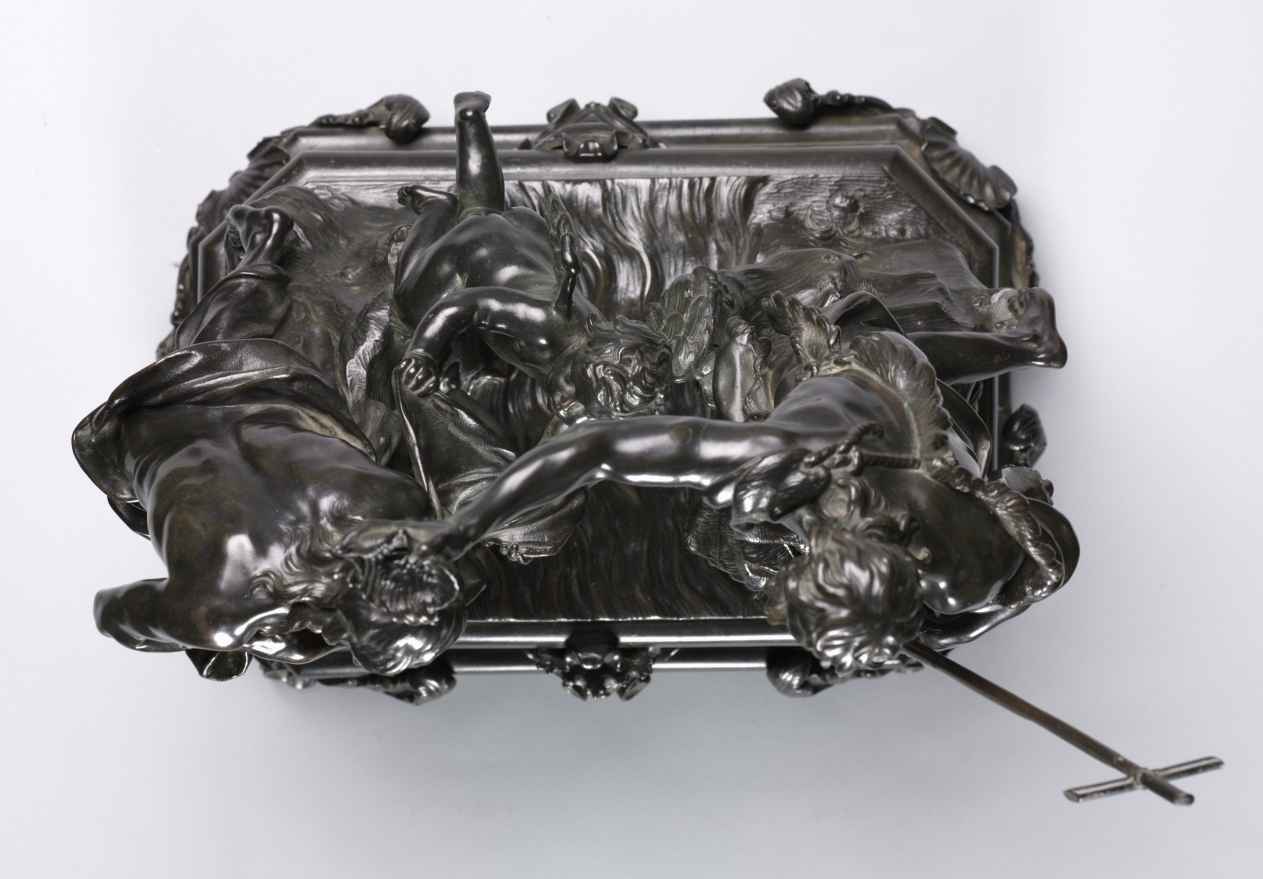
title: Baptism of Christ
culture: Italy, 17th century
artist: Alessandro Algardi (Italian, 1598–1654)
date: designed 1645–46, probably made 1650–55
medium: bronze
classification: Sculpture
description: When Innocent X (Giovanni Battista Pamphili, ruled 1644–55) became pope, Alessandro Algardi endeavored to obtain his patronage. This bronze Baptism of Christ is a casting from the molds used for an original silver sculpture that Algardi presented to the new pope to gain his support in 1646. The composition depicts an important scene in the life of Christ. On the right is John the Baptist, who pours water onto Jesus's head from a shell. As Christ bows his head to be baptized, a little angel holds the edge of his cloak. Algardi worked carefully to make this piece exciting from a number of points of view. Its dramatic emphasis shifts, depending on the viewer's vantage point.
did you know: Algardi's sculpture plays on its intended recipient's given name: Giovanni Battista (John the Baptist).